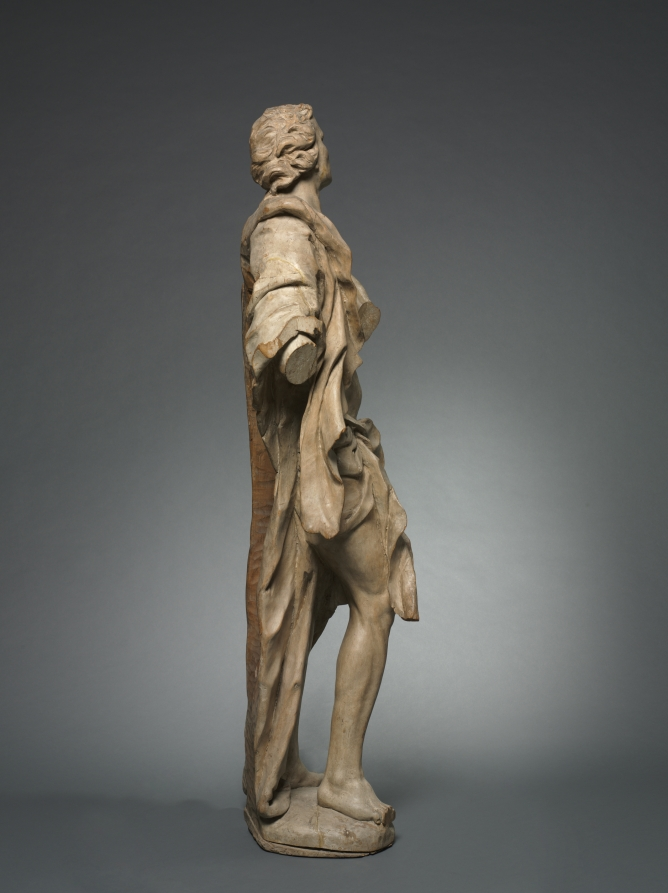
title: A Saint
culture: Germany or Austria, 18th century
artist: follower of Diego Francesco Carlone (Italian, 1674–1750)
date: c. 1730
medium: wood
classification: Sculpture